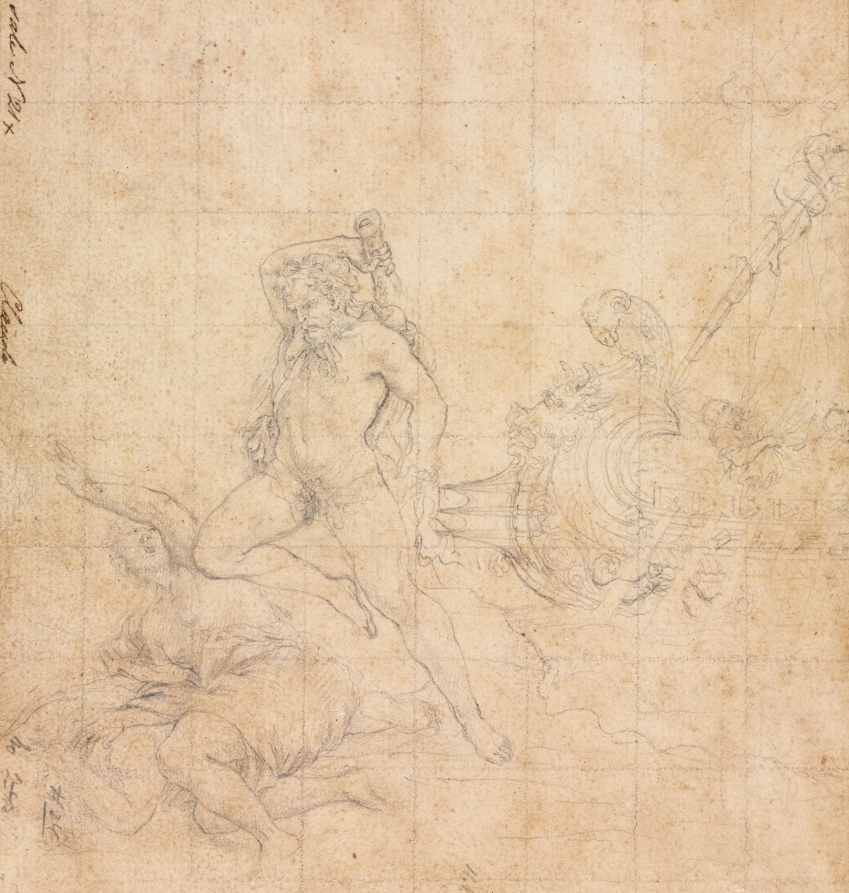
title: Hercules and the Girdle of Hippolyta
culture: Italy, 17th century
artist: Filippo Napoletano (Italian, c. 1587-c. 1629)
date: first quarter 1600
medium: graphite; squared in graphite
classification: Drawing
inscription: upper right, in graphite: No62 [sideways, underlined] / 38 ; center left, in brown ink: Claude [sideways] ; lower left, in graphite: #24 [sideways, 24 is underlined] ; lower left, in graphite: No 2[illegible, partially erased][all sideways] ; lower left, in graphite: 79 [sideways, crossed out] ; lower left, in graphite? [D?][illegible, partially erased, sideways] [C?][illegible, partially erased, sideways]; lower center, in graphite: 1[1?].00 [sideways]